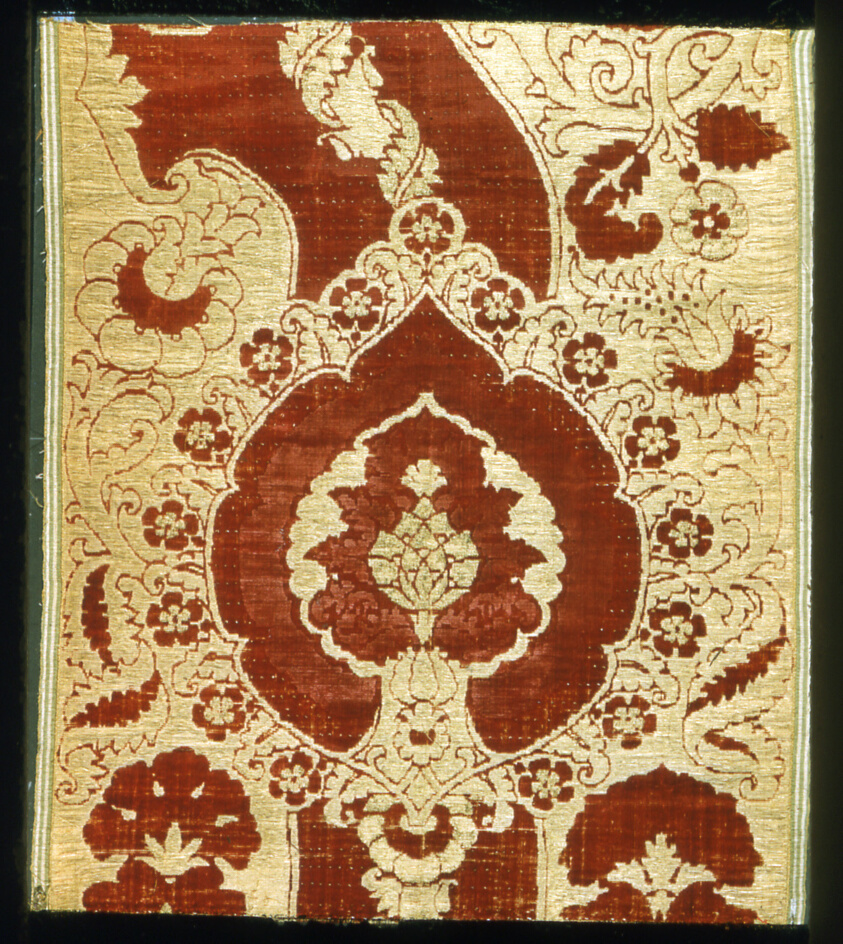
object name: Textile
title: Panel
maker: Italy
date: 1450/1500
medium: Silk, plain weave variation with supplementary gilt-metal-strip wrapped silk facing wefts forming weft loops in areas and with supplementary pile warps forming cut, pile-on-pile, voided velvet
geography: Italy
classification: textile; weaving - velvet; weaving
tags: flowers